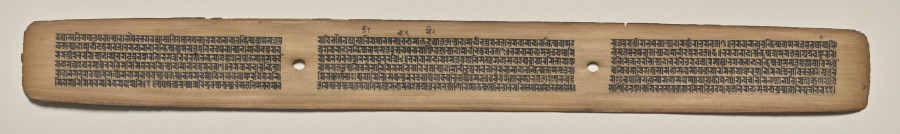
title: Text, Folio 125 (recto), from a Manuscript of the Perfection of Wisdom in Eight Thousand Lines (Ashtasahasrika Prajnaparamita-sutra)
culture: Eastern India, Bihar, Vikramashila Monastery. Painting: Nepal, Kathmandu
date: Sunday, September 14, 1119 (year 239 of the Newar Samvat in the month of Ashvina)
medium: gum tempera and ink on palm leaves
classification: Painting